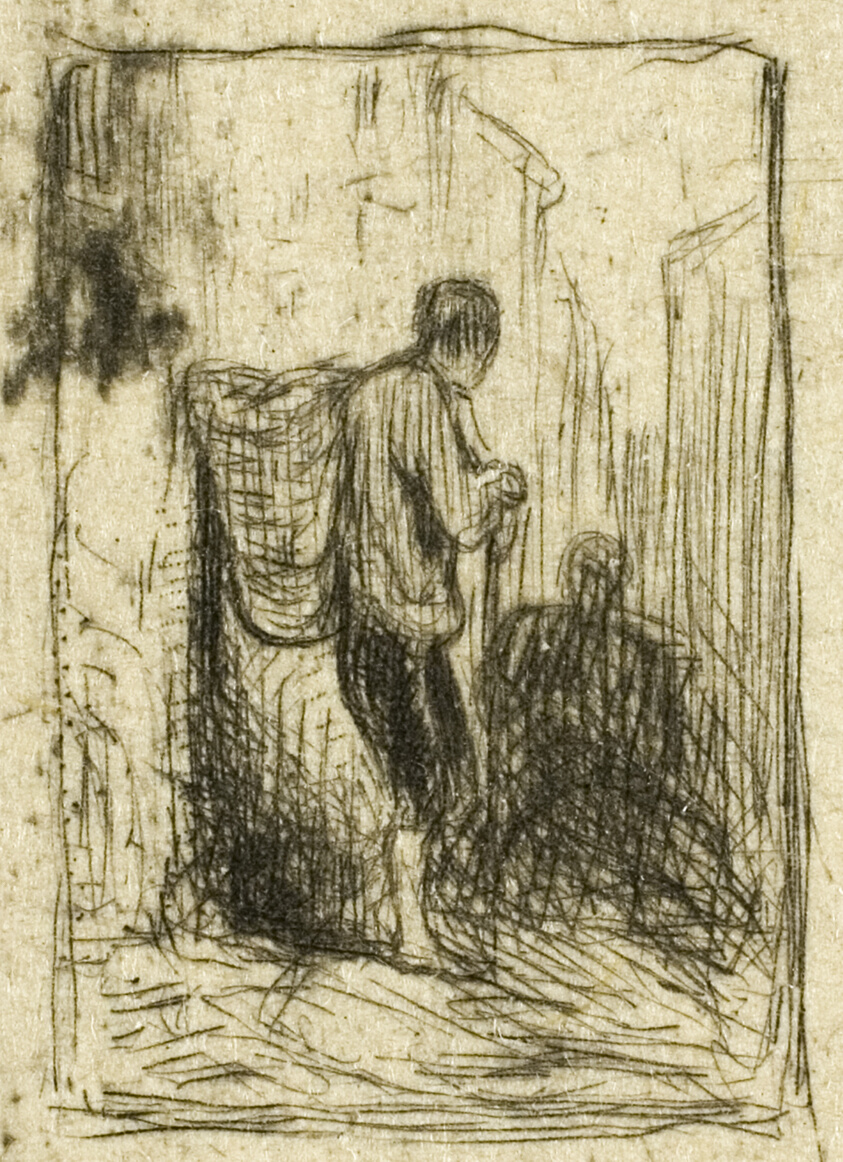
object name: Print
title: Rag-Picker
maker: Charles Émile Jacque (French, 1813-1894)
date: c. 1843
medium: Drypoint and roulette on ivory wove paper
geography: France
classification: drypoint; print; prints and drawing